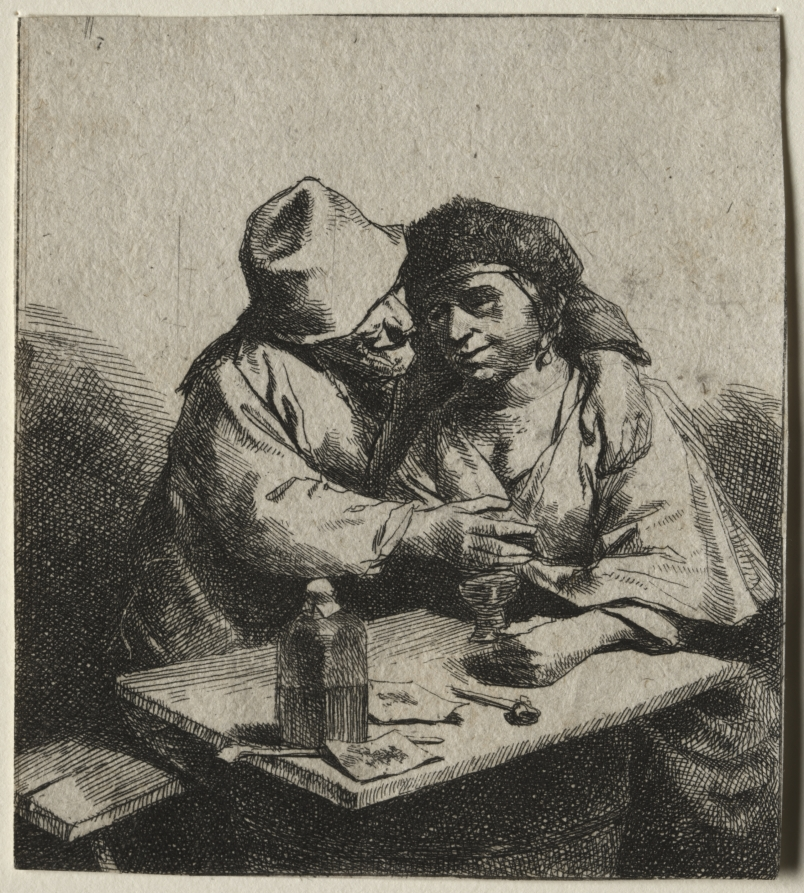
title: The Amorous Couple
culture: Netherlands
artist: Cornelis Pietersz Bega (Dutch, 1631/32–1664)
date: 1642–64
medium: etching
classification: Print